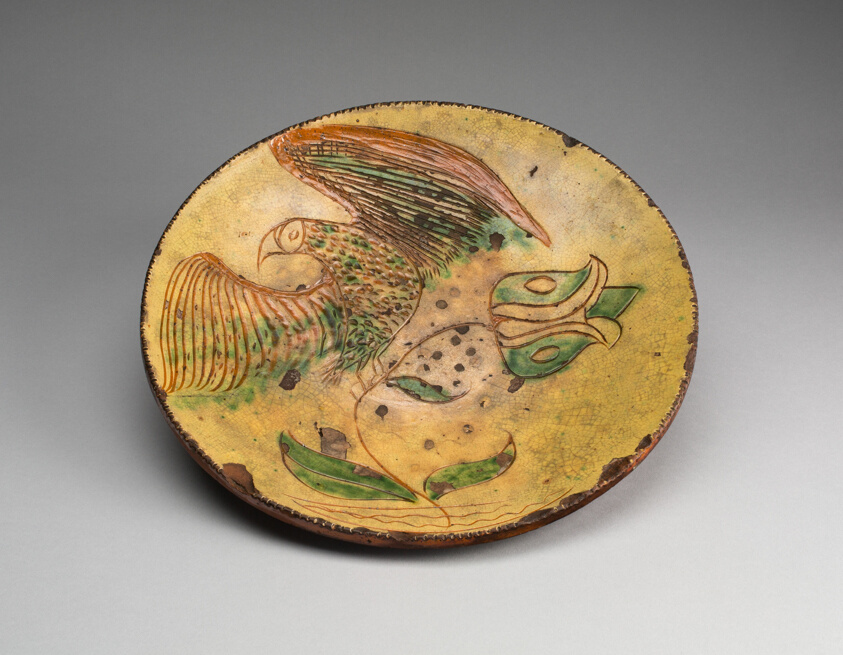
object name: Ceramics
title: Plate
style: Folk Art, pennsylvania german, american colonial, americas, 18th Century, 19th century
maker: Artist unknown (American, 18th–19th century); Pennsylvania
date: 1790–1830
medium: Earthenware (redware), cream-colored slip, and green and clear lead glazes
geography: Pennsylvania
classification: plate (general, dish); dish (vessel); earthenware; american decorative arts; american arts; ceramics; decorative arts; pottery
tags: tulips, coggled edge, bird, parrots